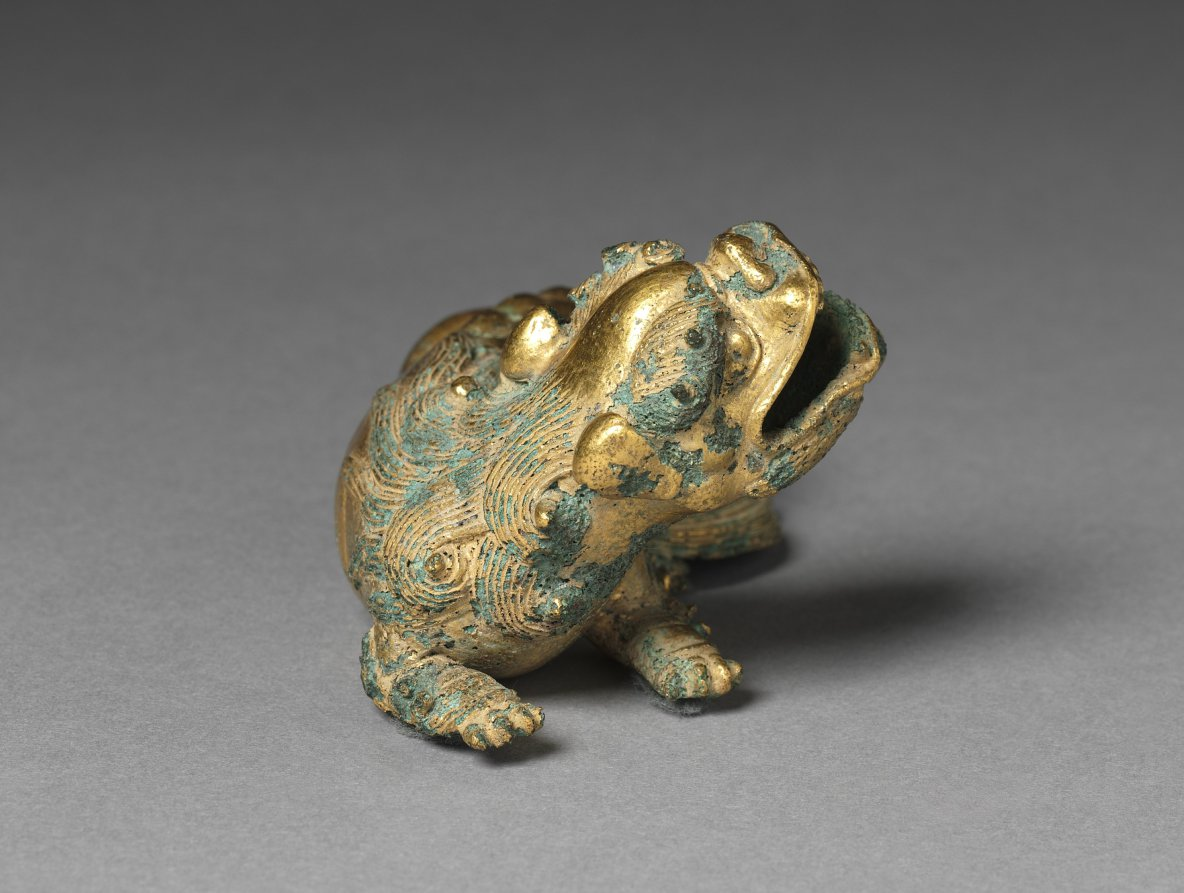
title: Dog-shaped Paperweight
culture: Korea, Unified Silla period (676-935)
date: 676–935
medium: gilt bronze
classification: Sculpture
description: This small object in the shape of a hybrid dog-lion is believed to have been used as a paperweight. Since the Three Kingdoms period (57 BC−668), mercury amalgam gilding had been widely employed to embellish metal objects as well as to make their surface resistant to acids. This technique involves mixing pure gold powder with liquid mercury to form a paste-like mixture. As heat is applied, the mercury evaporates, but an opaque layer of gold remains on the surface. This coating must be polished by first rubbing it with dried rice seedlings, then processing it in ash lye to eliminate impurities; next, the piece is washed and rinsed in a plum vinegar bath.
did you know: This is a dog and lion hybrid.